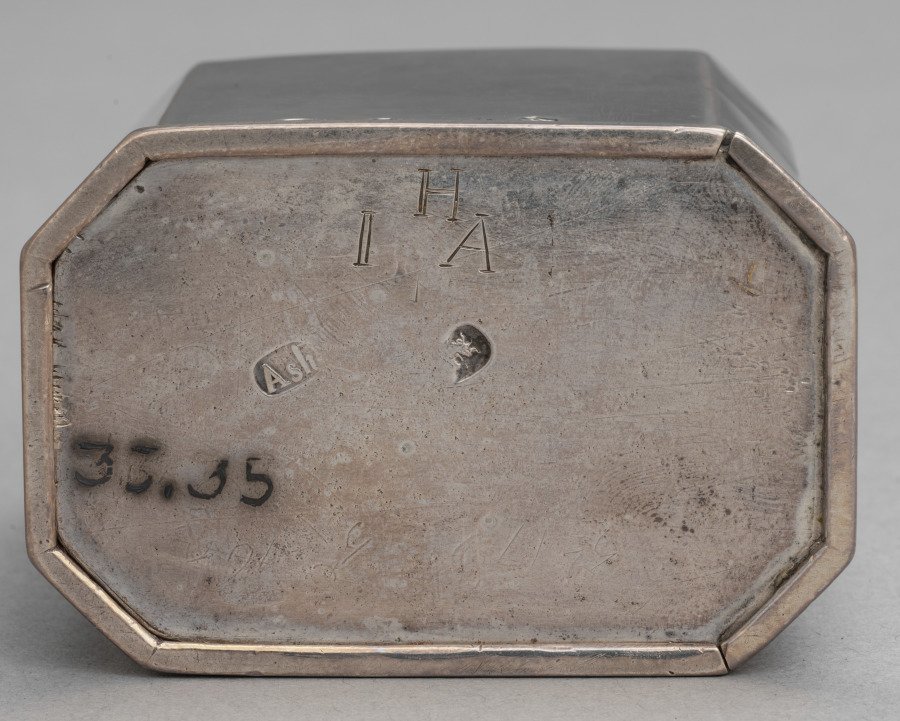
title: Tea Caddy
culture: England, London, 18th century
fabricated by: Thomas Ash (British)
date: 1713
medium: silver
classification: Silver